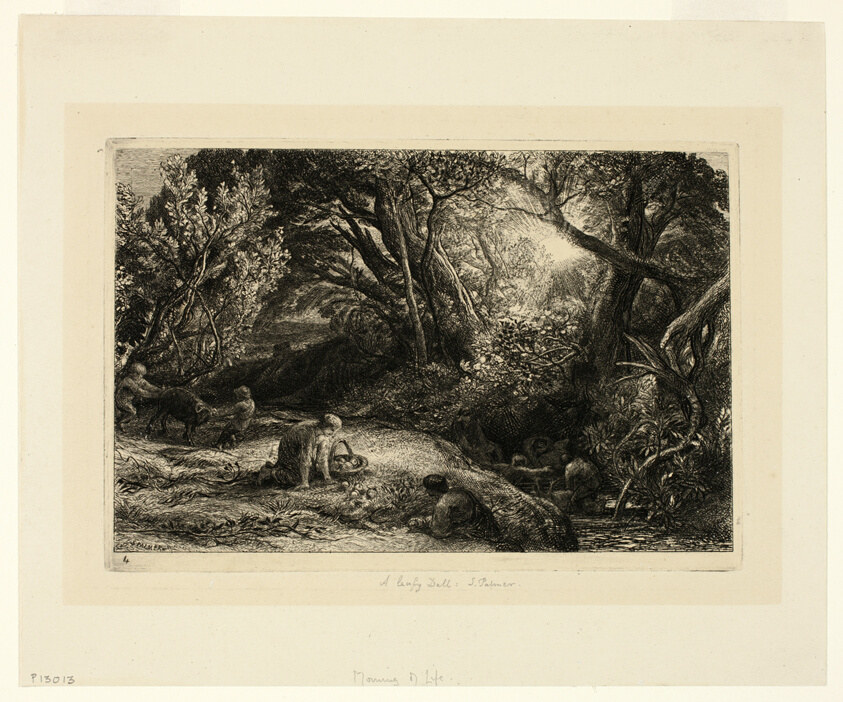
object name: Print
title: The Morning of Life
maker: Samuel Palmer (English, 1805-1881)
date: 1860/1861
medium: Etching in black on paper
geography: England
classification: etching; print; prints and drawing